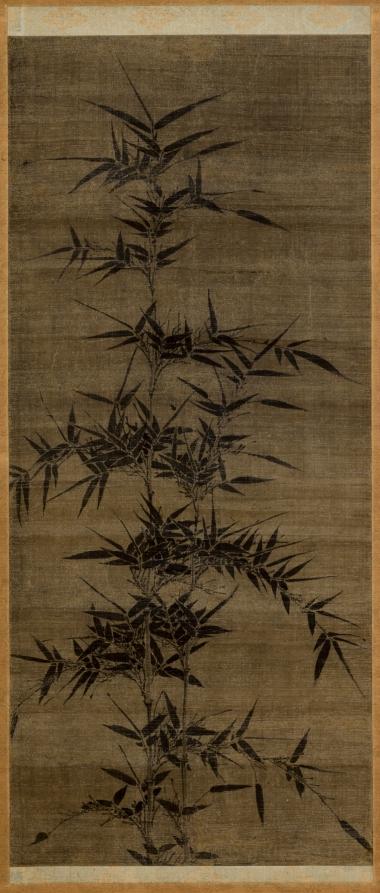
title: Ink Bamboo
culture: China, Southern Song dynasty (1127-1279)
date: 1200s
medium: hanging scroll; ink on silk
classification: Painting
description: This deceptively simple composition features two upright stalks of bamboo with leafy stems extended to fill the silk. The painter sensitively balanced ink tones and brushstrokes. The leaves that cross in front of other leaves are outlined in clear silk.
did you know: In traditional Chinese culture, bamboo symbolizes a gentleman's virtuous resilience and flexibility.